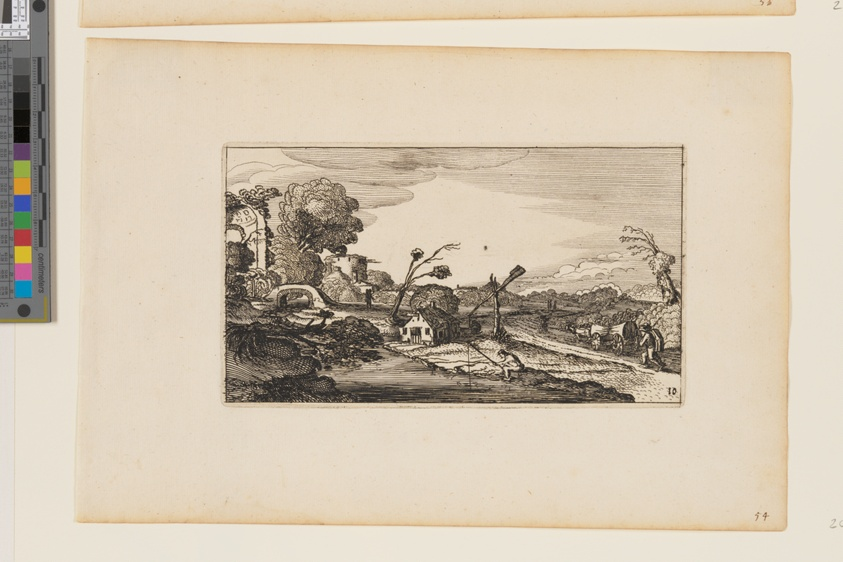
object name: Print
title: Path to Right of Water; Roman Ruins Beyond at Left, from Twelve landscapes with Figures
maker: After Gillis van Scheyndel; Dutch, 1595–1660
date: 1624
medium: Etching on ivory laid paper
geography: Netherlands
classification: etching; paper; print; prints and drawing